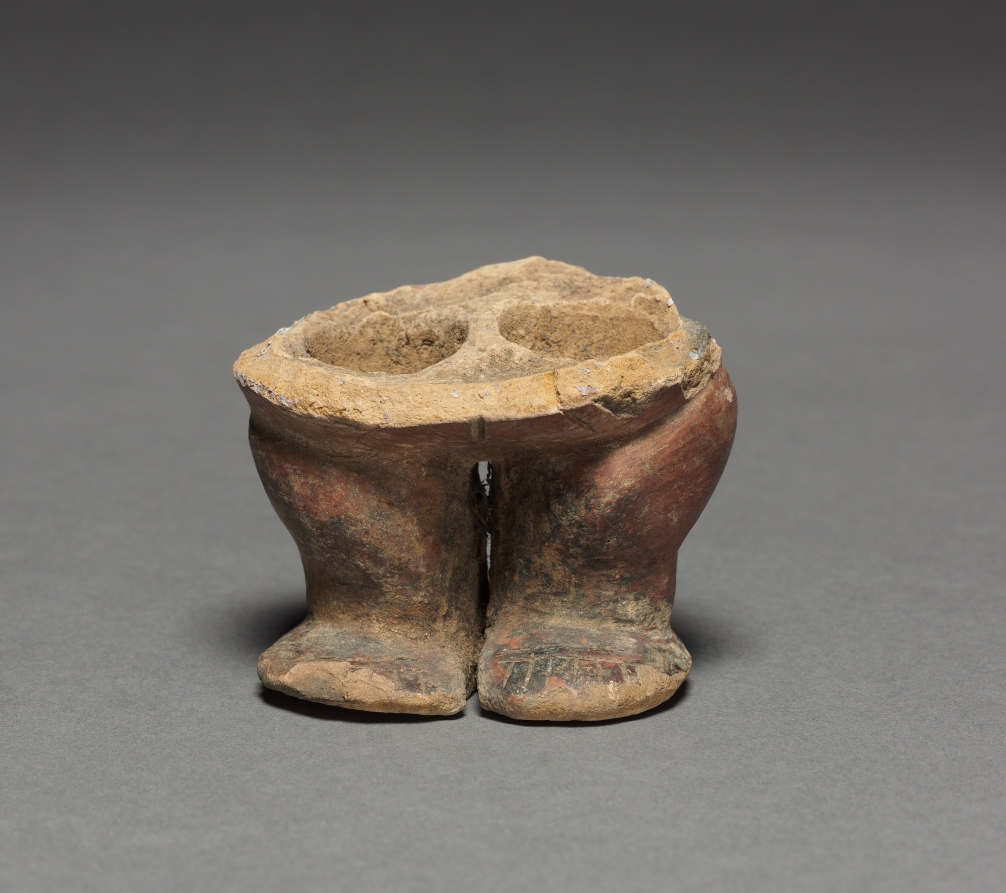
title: Jar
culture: Colombia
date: before 1550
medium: black ware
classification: Ceramic